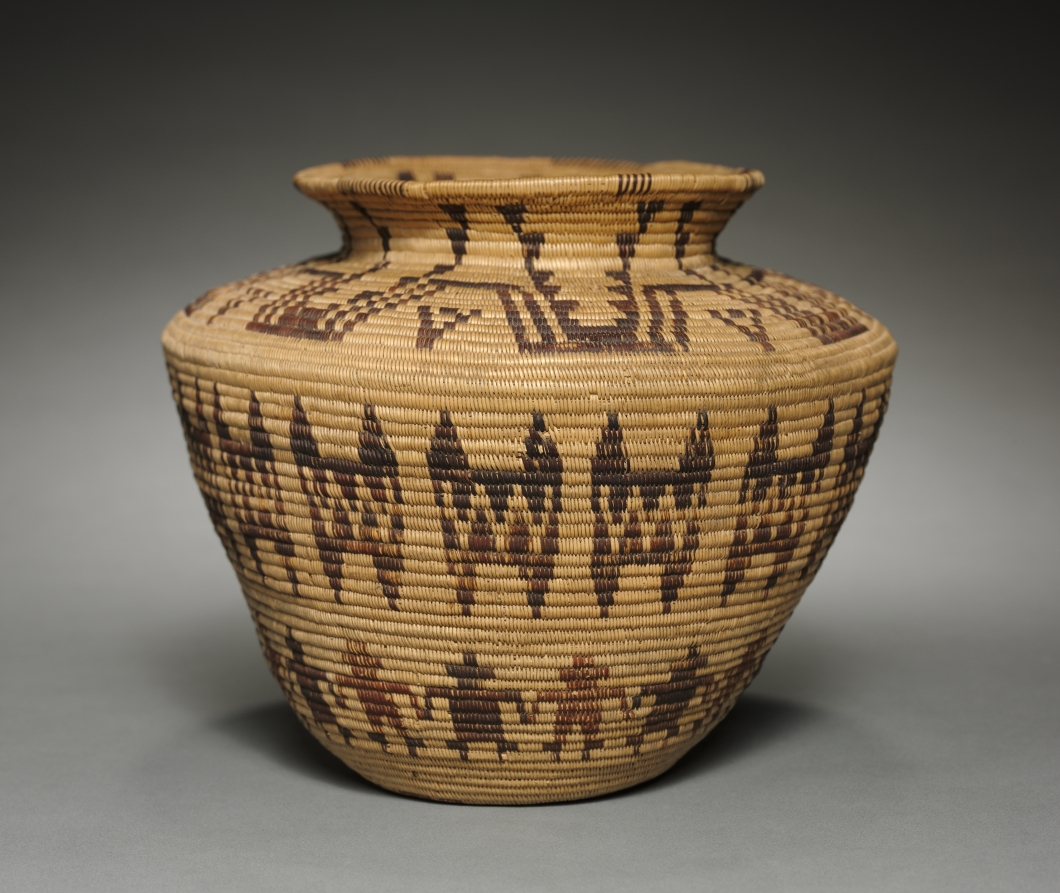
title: Jar-shaped Basket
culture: Native North America, Great Basin, California, Death Valley, Timbisha (Panamint) Shoshone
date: c. 1900–1910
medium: willow, bulrush, yucca root; coiled (3 rods)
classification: Basketry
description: The figures woven in the lower register of this basket were borrowed from basketry of the Yokuts, a California group that lived to the west of Timbisha (Panamint) Shoshone territory.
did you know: The figures woven in the lower register of this basket were borrowed from basketry of the Yokuts.